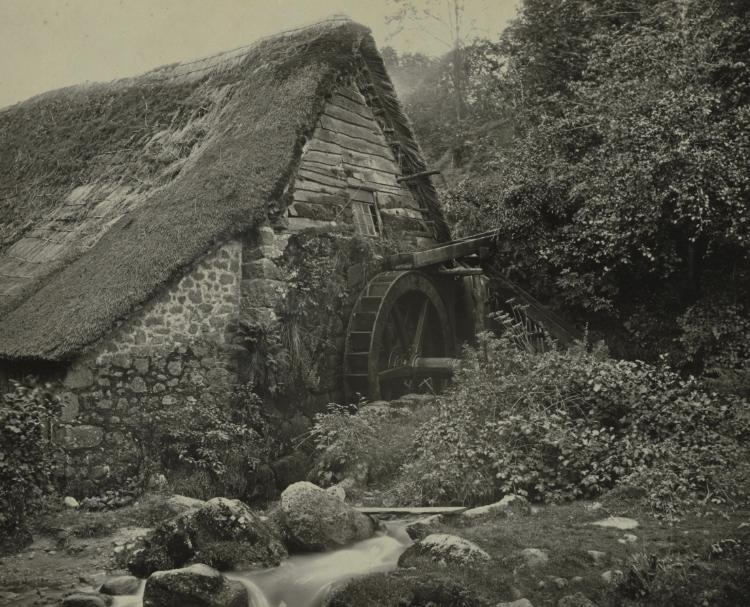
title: Holy Street Mill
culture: England, 19th century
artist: Francis Bedford (British, 1816–1894)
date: late 1860s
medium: carbon print (autotype)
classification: Photograph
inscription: none